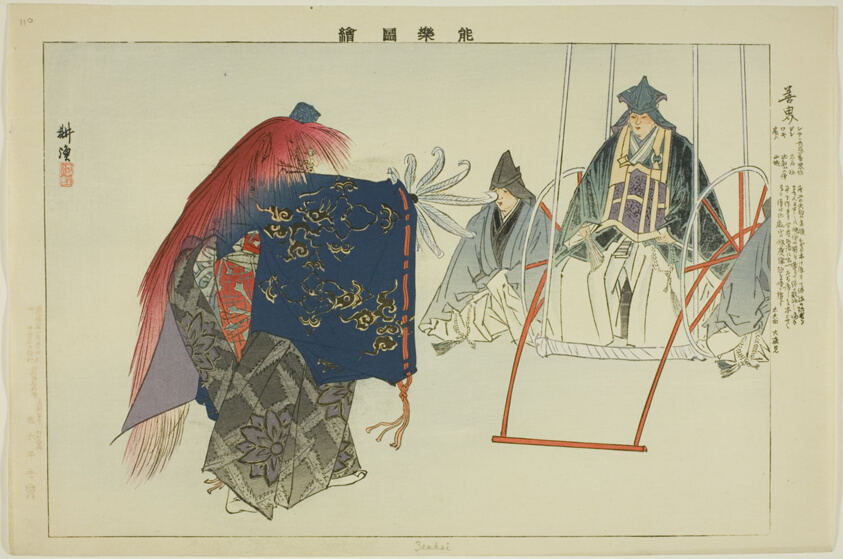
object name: Print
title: Zenkai, from the series "Pictures of No Performances (Nogaku Zue)"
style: Japanese (culture or style)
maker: Tsukioka Kogyo; Japanese, 1869-1927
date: 1898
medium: Color woodblock print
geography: Japan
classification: woodblock print; print; asian art